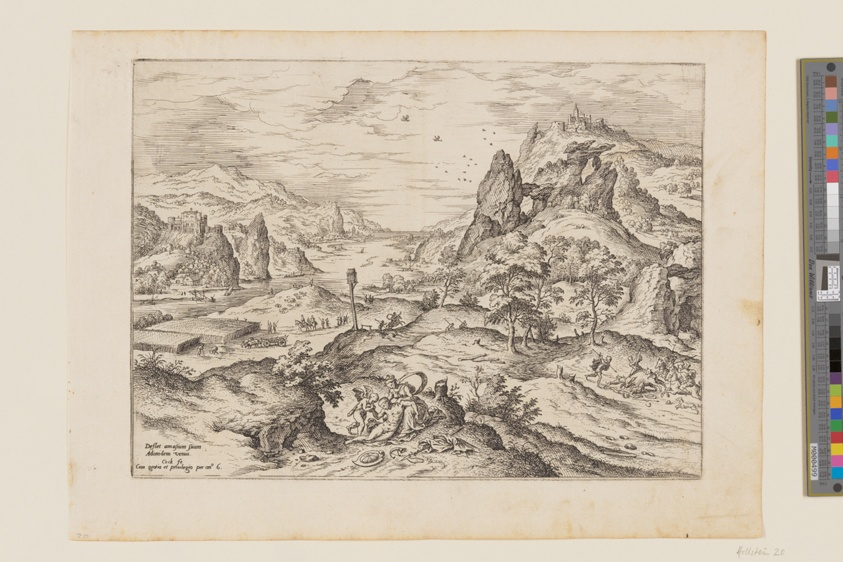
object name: Print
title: Venus and Adonis, from Landscapes with Biblical and Mythological Scenes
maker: Hieronymus Cock (Netherlandish, c. 1510–1570); after Matthys Cock (Netherlandish, c. 1505-1548)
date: 1558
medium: Etching on ivory laid paper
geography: Netherlands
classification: etching; paper; print; prints and drawing